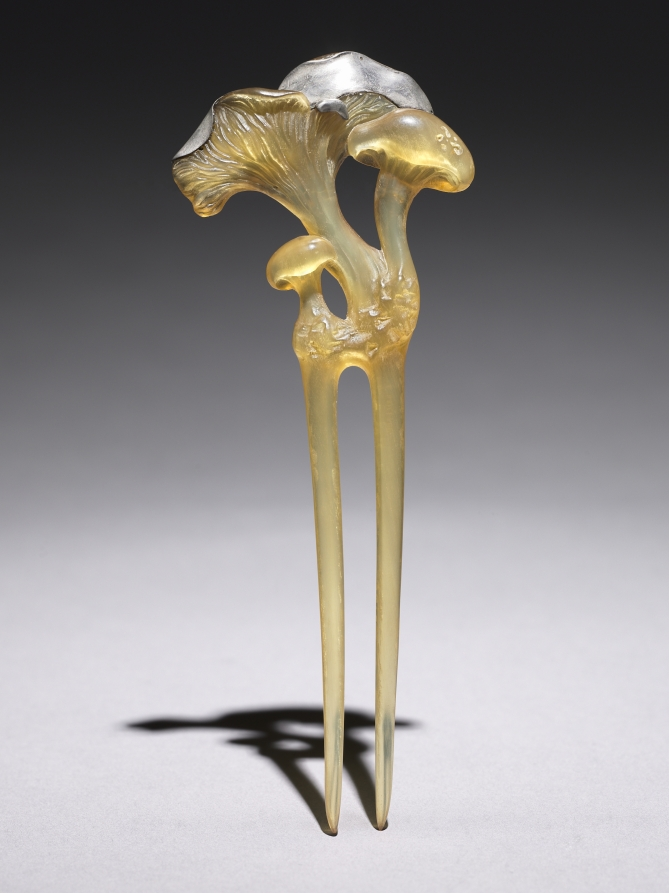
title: Hair Ornament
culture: France, early 20th Century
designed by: Jeannine Chenneviere (French)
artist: possibly by Lucien Gaillard (French, 1861–1942)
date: c. 1903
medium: horn with silver mounts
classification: Jewelry